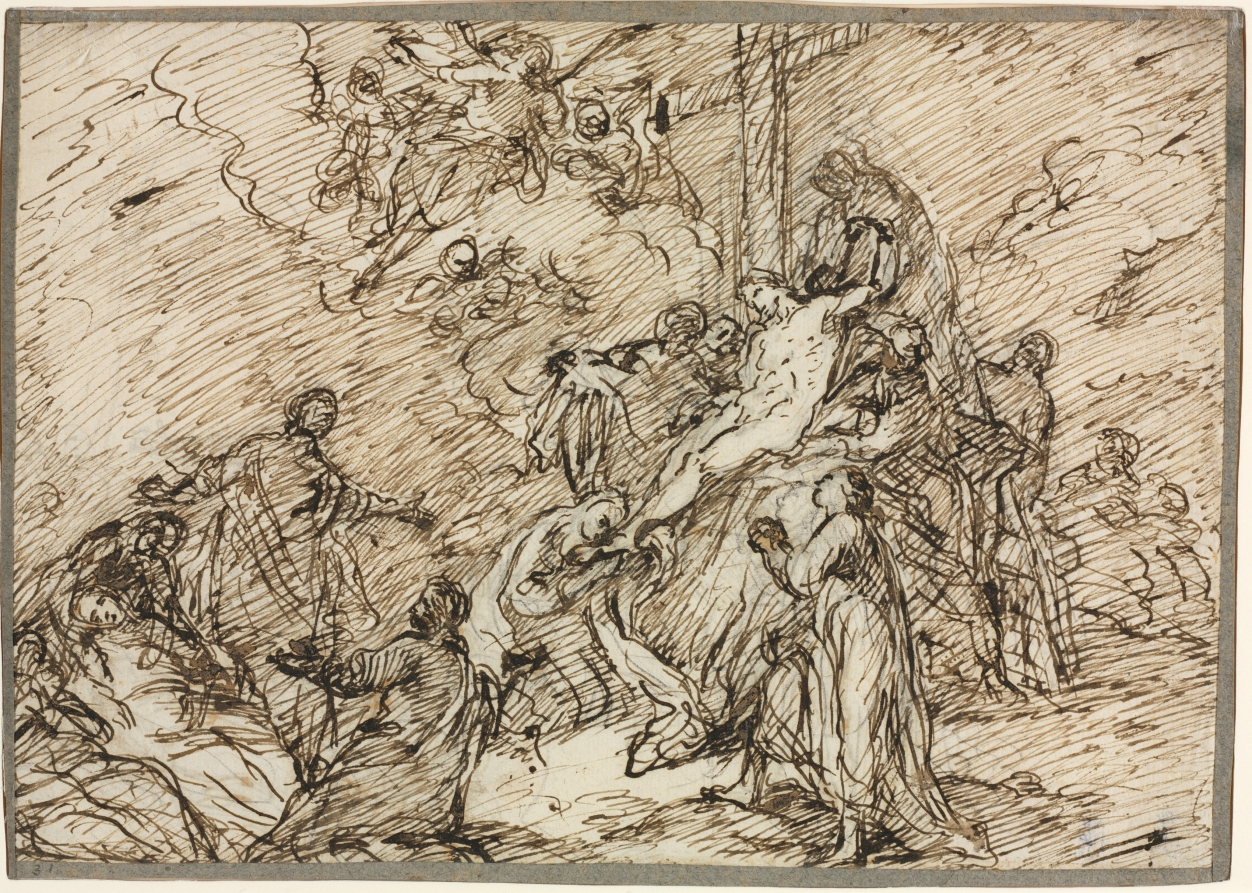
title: The Deposition (recto)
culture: Germany, 18th century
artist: Christian Wink (German, 1738–1797)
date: second half 18th century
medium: pen and brown ink over black chalk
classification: Drawing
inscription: lower left, on paper strip mounted to perimeter of drawing, in graphite: 31